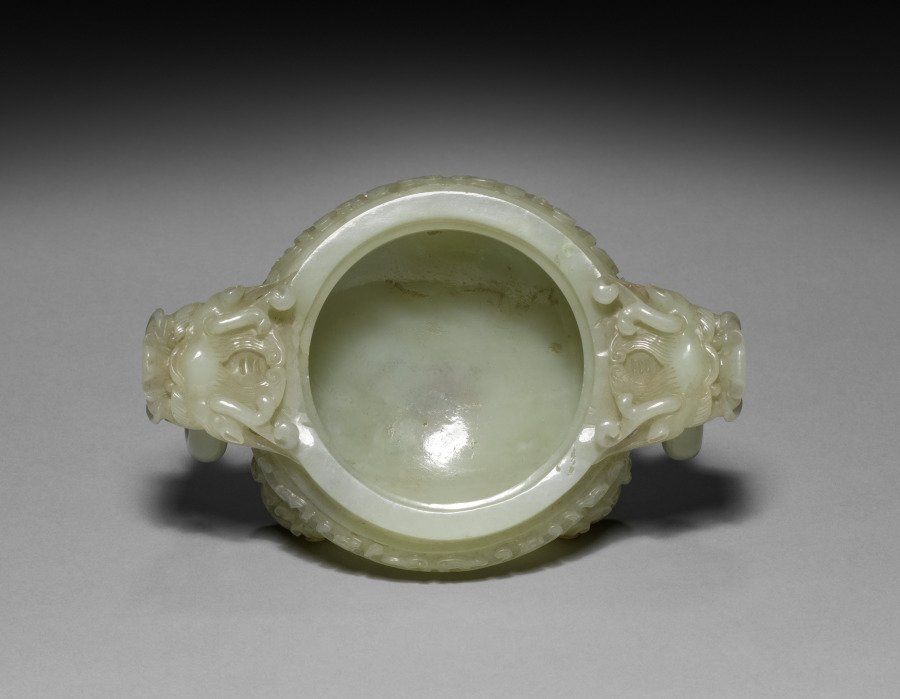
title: Tripod Incense Burner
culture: China, Qing dynasty (1644-1911)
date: 1644–1911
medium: jade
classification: Jade